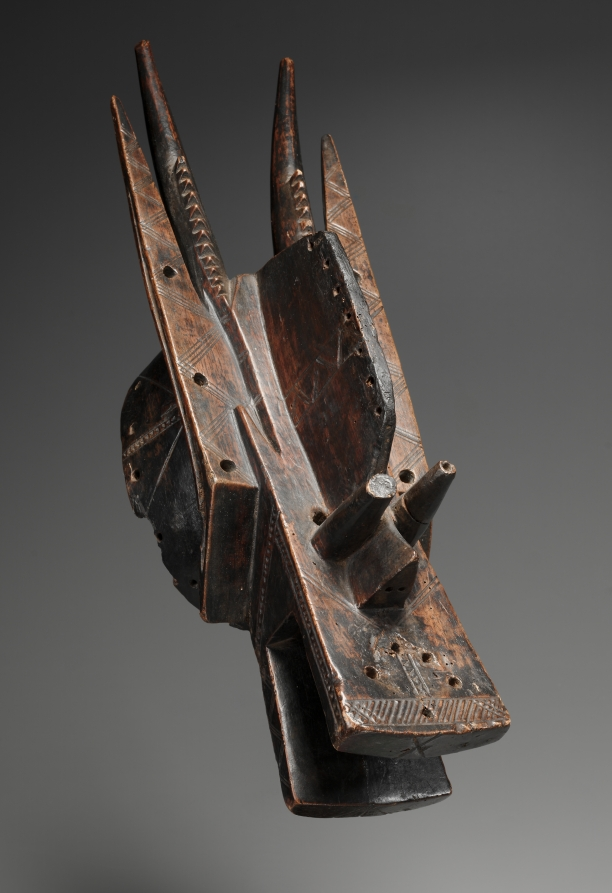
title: Helmet Mask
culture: Africa, West Africa, Mali, Malinke-style blacksmith-carver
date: mid- to late 1800s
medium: Wood and probably resin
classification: Mask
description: Combining animal and human traits, this example of a genre of mask called suruku, meaning “hyena,” most likely belonged to the Korè, one of six power associations that the Malinke would have adopted from their Bamana neighbors. The Korè is concerned with the circumcision and initiation of male youths into adulthood. The mask probably served as one of the symbols of the different Korè classes.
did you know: Holes along the top ridge of this mask once held a crest made of cane, red fibers, and cowrie shells.